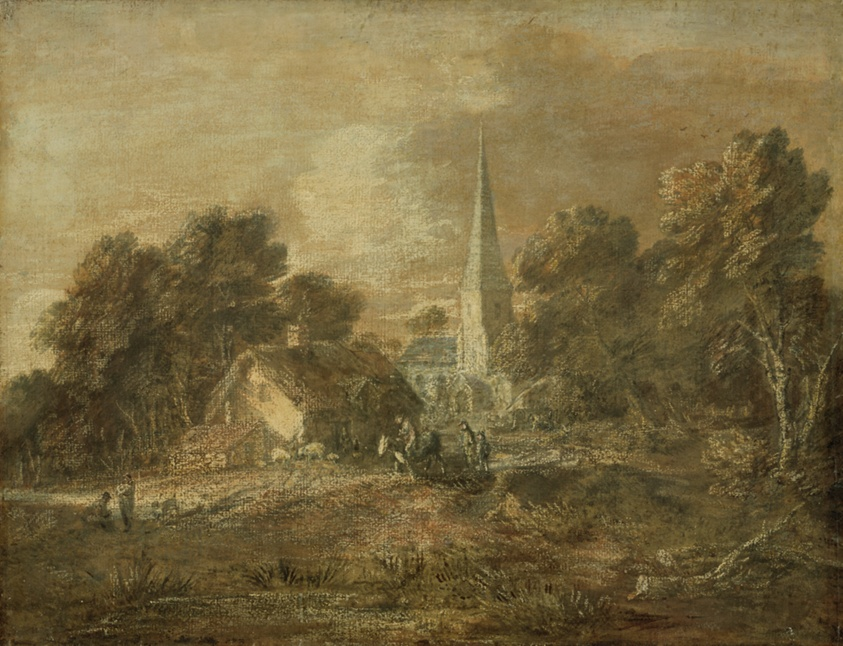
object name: Drawing and Watercolor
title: Wooded Landscape with Village Scene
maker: Thomas Gainsborough (English, 1727–1788)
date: early 1770s (not later than 1772)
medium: Varnished gouache, over black and red chalks, on cream laid paper, laid down on canvas, stretched on a wooden stretcher and varnished again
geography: England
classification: prints and drawing; chalk; gouache; drawings (visual works)